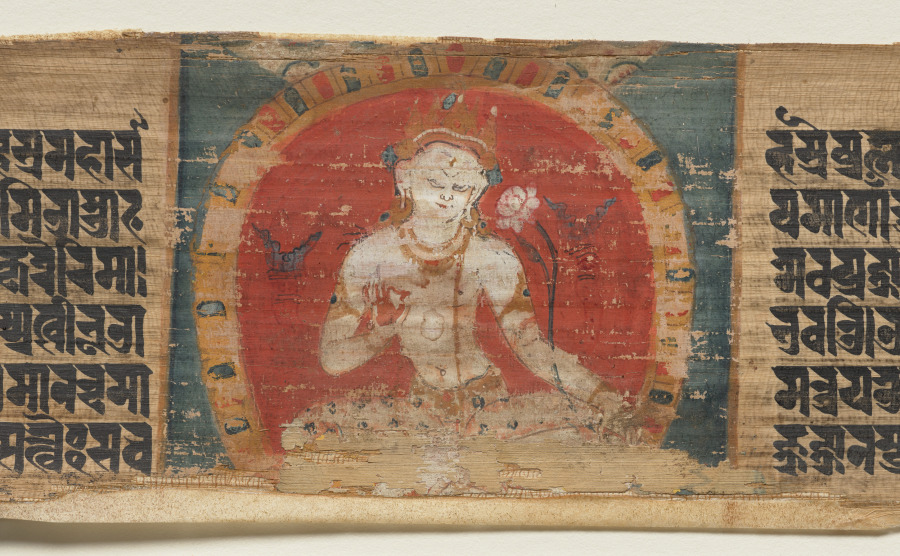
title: Text, folio 186 (recto), from a Manuscript of the Perfection of Wisdom in Eight Thousand Lines (Ashtasahasrika Prajnaparamita-sutra)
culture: Eastern India, Bihar, Vikramashila Monastery. Painting: Nepal, Kathmandu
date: Sunday, September 14, 1119 (year 239 of the Newar Samvat in the month of Ashvina)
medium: Gum tempera and ink on palm leaf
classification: Painting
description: This manuscript, consisting of 188 double-sided folios, was calligraphed by a scribe at a monastery in northeastern India, commissioned by a monk from Nepal. Judging from the style of the paintings, they are the work of Nepalese artists.